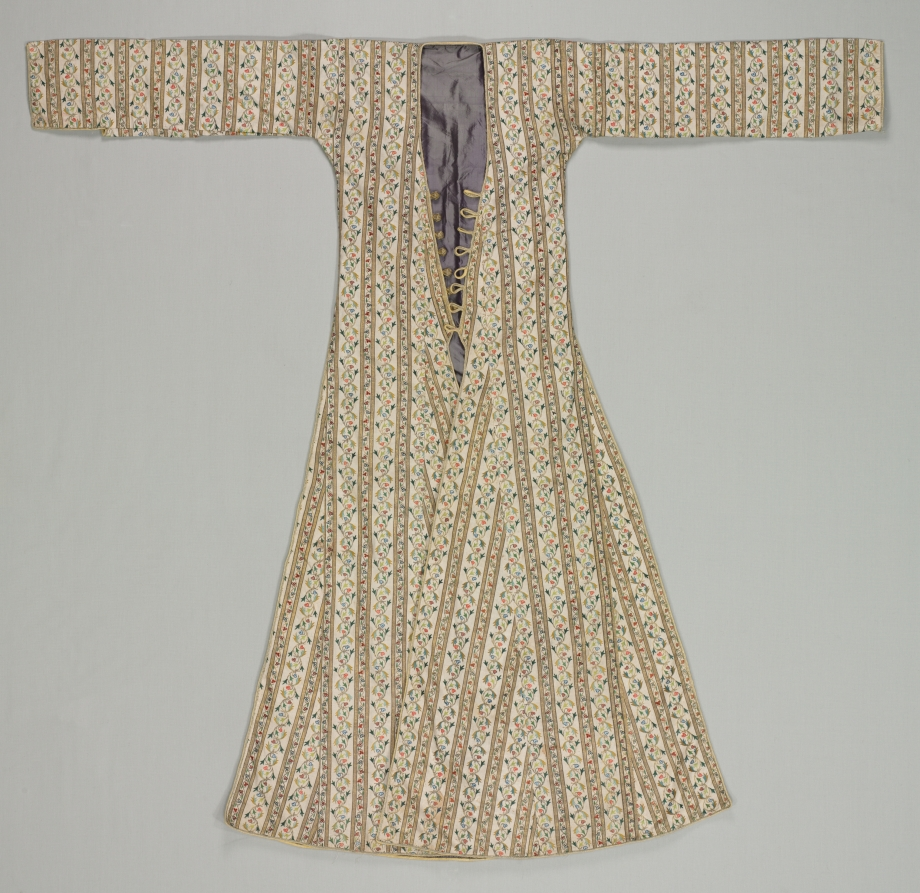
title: Woman's robe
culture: Turkey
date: 1800s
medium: striped fabric; plain weave: silk; embroidery, chain stitch: silk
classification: Garment